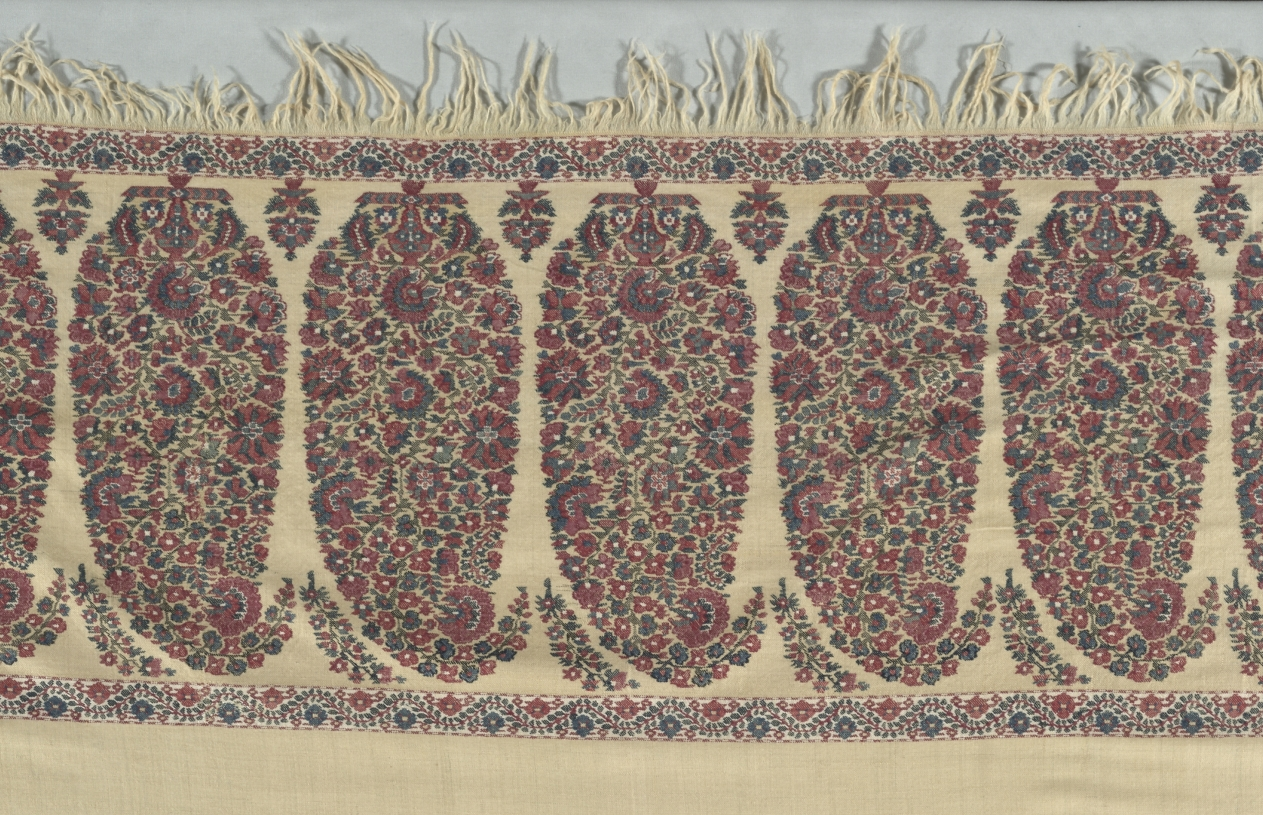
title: Yellow Long Shawl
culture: India, Kashmir, Afghan period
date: before 1815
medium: 2/2 twill tapestry weave [S], double interlocking; wool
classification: Textile